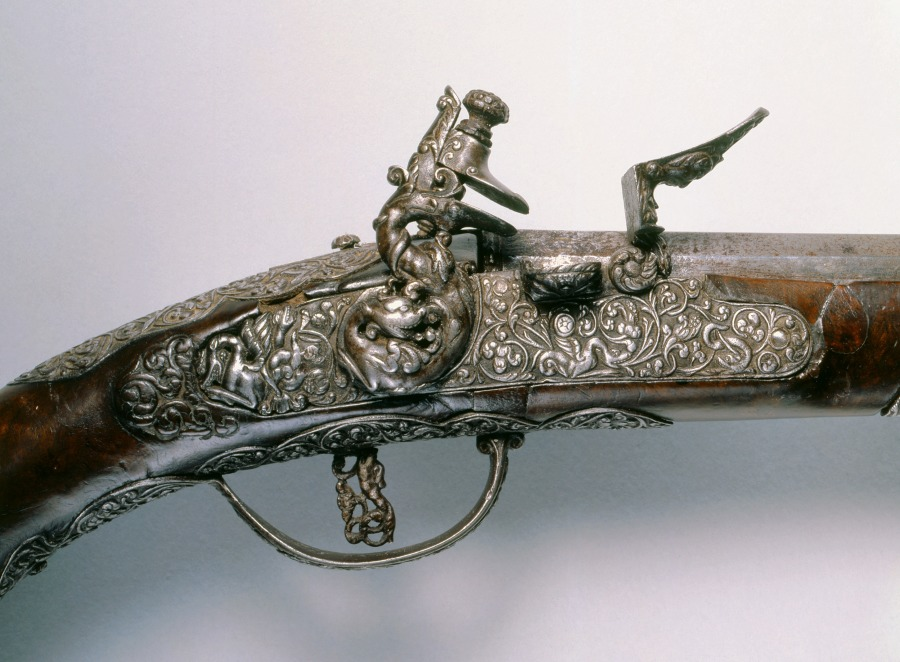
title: Pair of Flintlock Pistols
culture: Italy, Brescia, 17th century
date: c. 1670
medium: steel, chiseled decoration with walnut stock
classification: Arms and Armor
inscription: P. Moretta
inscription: CARLO LERME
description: The chiseling of gun ornament is a task comparable to sculpture on a miniature scale, carried out in an extremely hard material. Since this was usually beyond the skill of most gunsmiths, it was not uncommon for such work to be contracted out as occurred here. While the barrels are signed P. Moretta, the lock plates of these pistols are signed Carlo Lerme, who also chiseled the mounts.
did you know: This type of pistol fired only once before needing to be reloaded, so they were often produced in matched pairs. Even the trigger is decorated on these beautifully ornate weapons. Look closely to compare how a skilled craftsman carefully matched the patterning on these two guns.